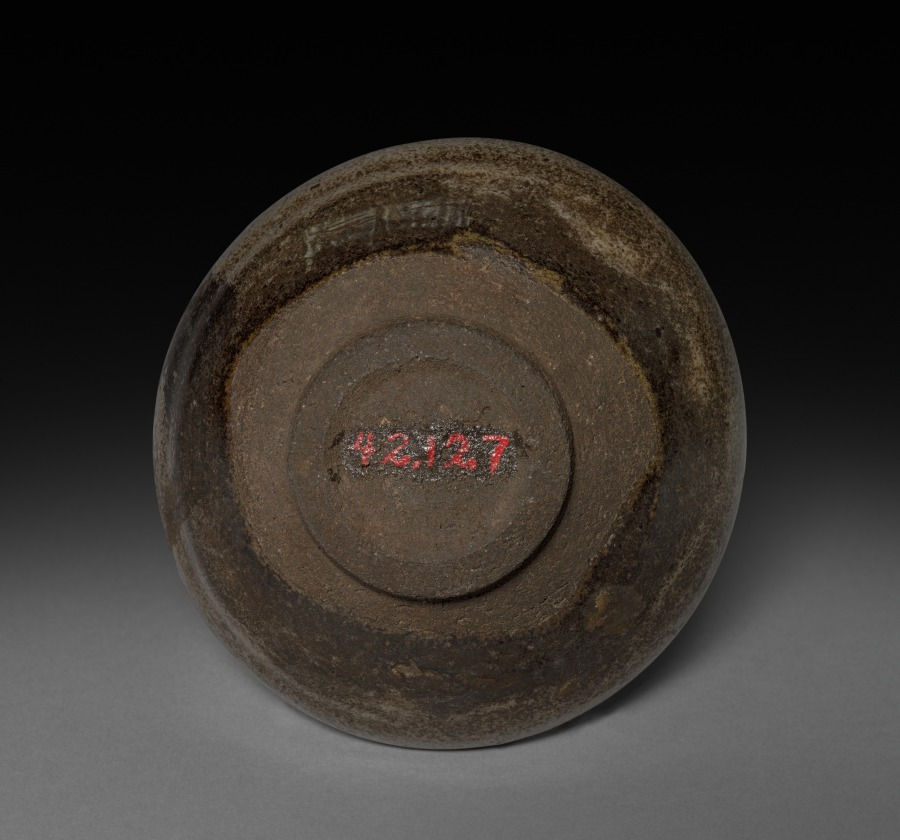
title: Tea Bowl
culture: China, Fujian province, Song dynasty (960-1279)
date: 960–1279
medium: stoneware, Jian ware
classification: Ceramic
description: This brownish-black stoneware tea bowl has rounded sides. Its mottled and blurred green-gray and brown glaze stop short of the foot.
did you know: Jian ware was very popular with the tea cultures in China and Japan.